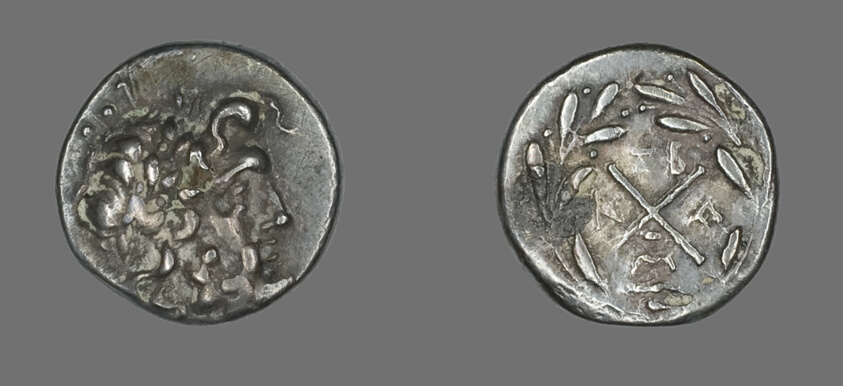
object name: Coin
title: Hemidrachm (Coin) Depicting the God Zeus Amarios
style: greek, ancient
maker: Greek, minted in Messene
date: 191-146 BCE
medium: Silver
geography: Ancient Greece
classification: coin; ancient art